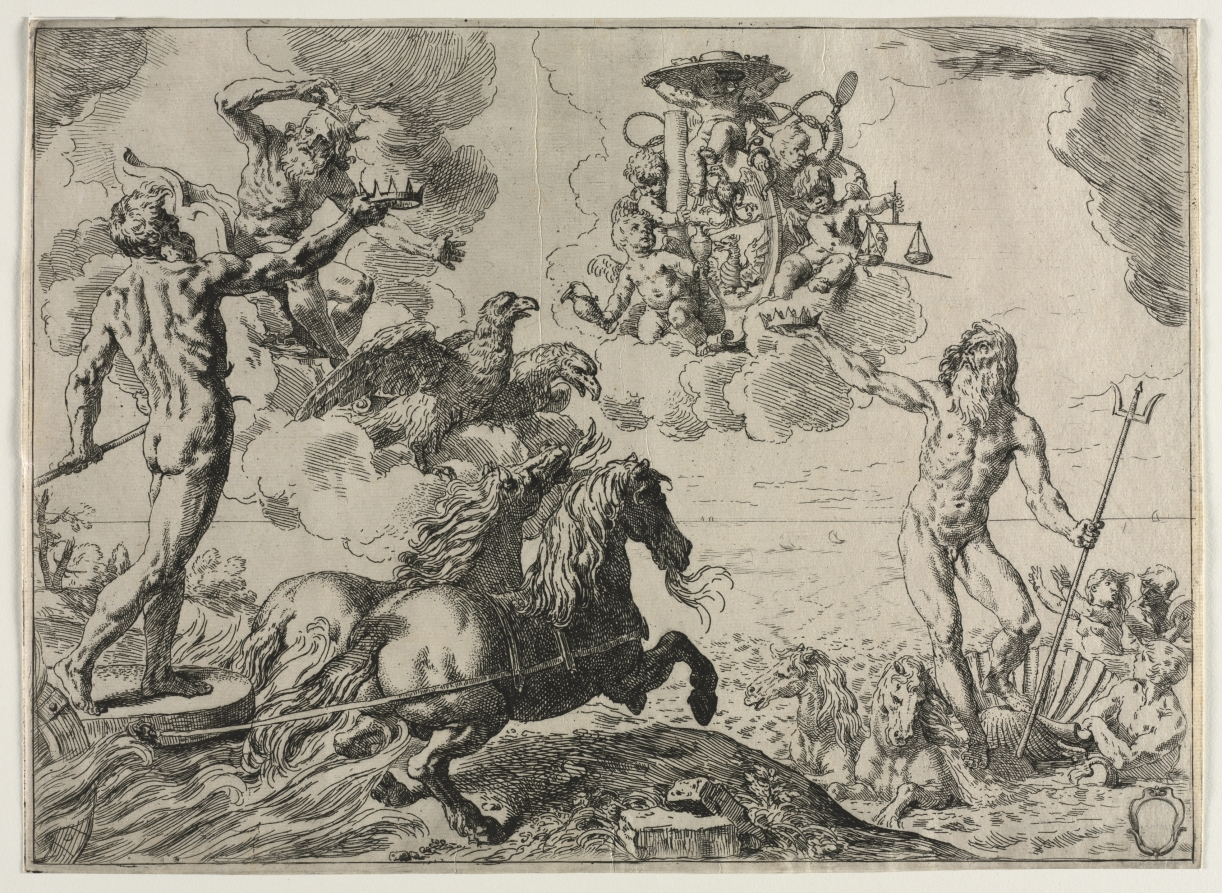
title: The "Quos Ego"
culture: Italy, 17th century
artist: Simone Cantarini (Italian, 1612–1648)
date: 1632–48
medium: etching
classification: Print